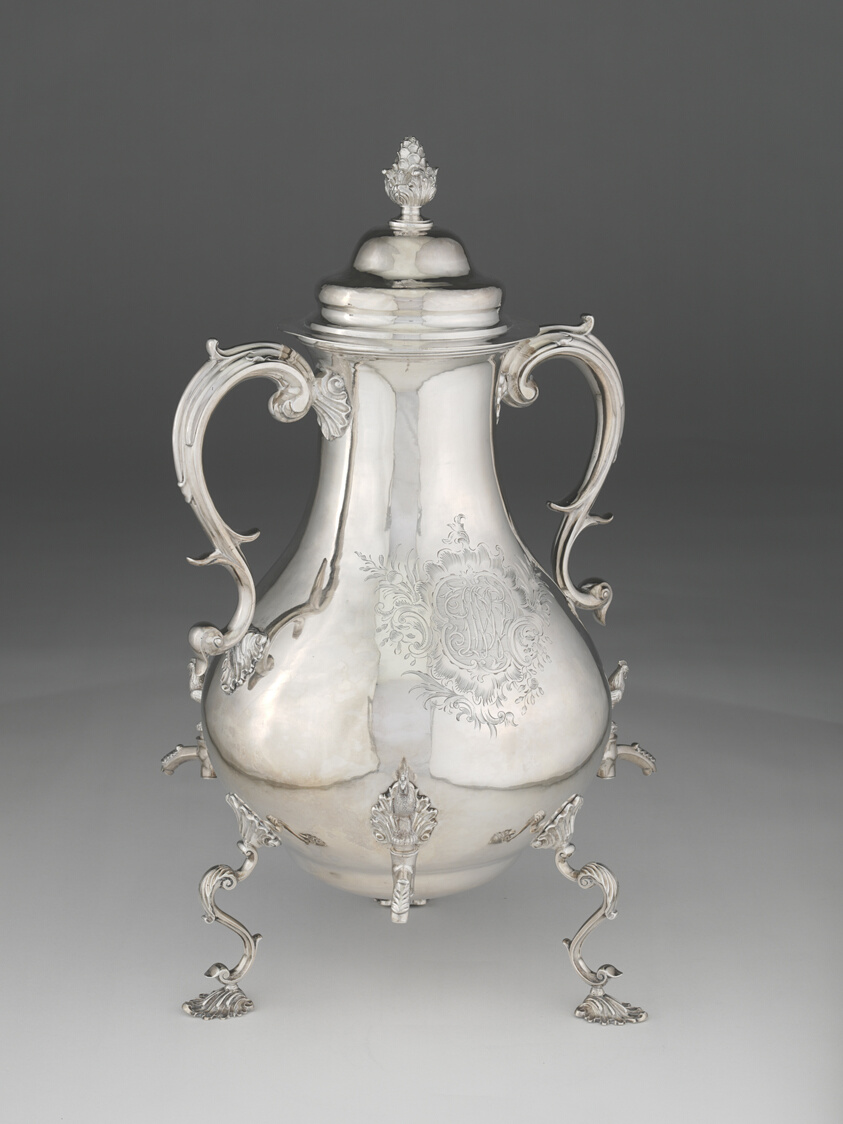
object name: Metalwork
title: Urn with Cover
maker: Ephraim Brasher; American, 1744–1810; New York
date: c. 1770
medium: Silver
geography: New York City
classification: vessel for serving drinks; silver; american decorative arts; american arts; decorative arts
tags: dining, drinking